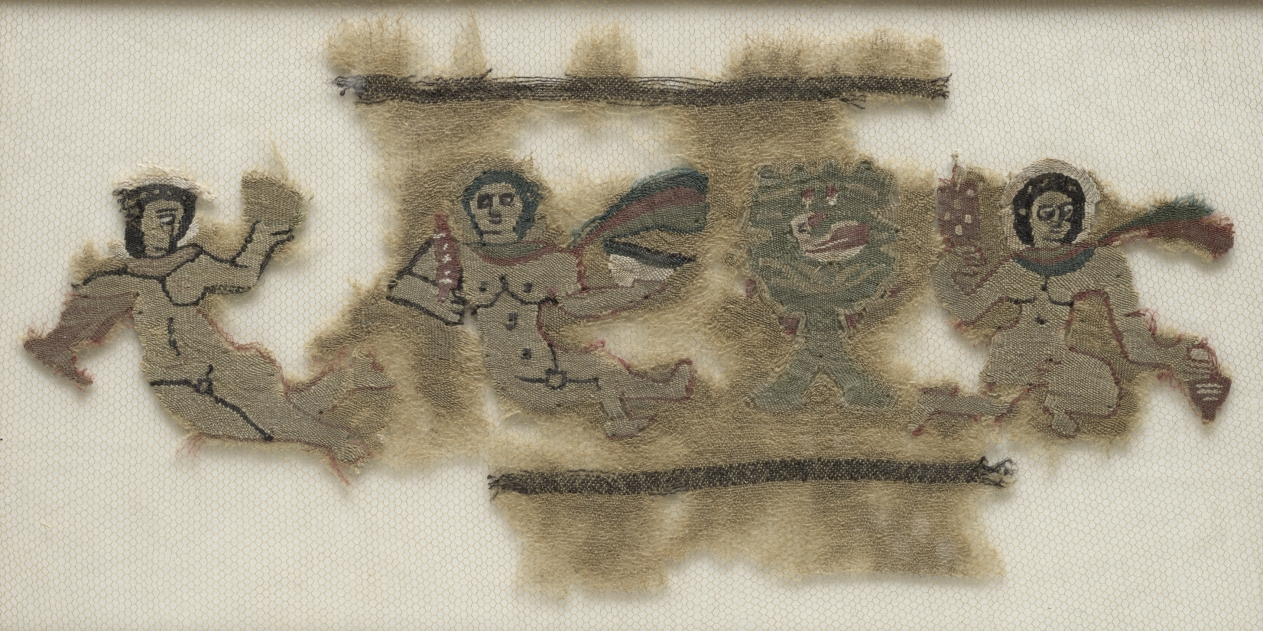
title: Fragment of a Border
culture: Egypt, 9th century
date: 800s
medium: tabby weave with inwoven tapestry ornament, linen and wool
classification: Textile